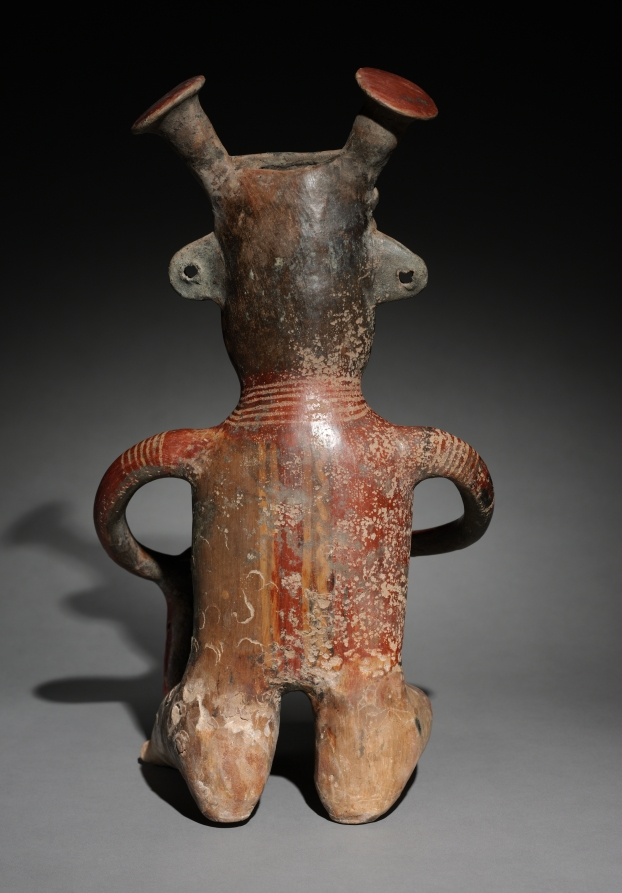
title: Seated Male Figure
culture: Mexico, Jalisco, Zacatecas Style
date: c. 200 CE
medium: earthenware with colored slips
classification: Sculpture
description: A female once accompanied this abstract male. The two may have had the same meaning as the nearby couple. They were also similarly linked by physical form, though the female’s head had no projections, the meaning of which is unknown. The size of the circle formed by the arms suggests that the figure once held something, perhaps a perishable offering.